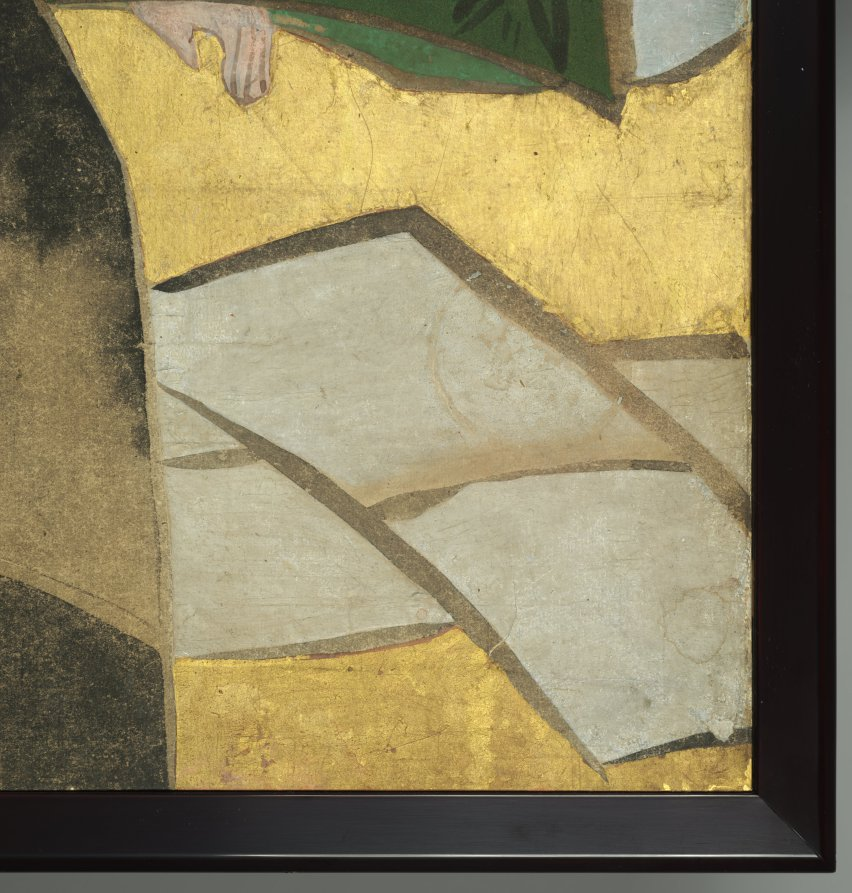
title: Thirty-Six Poetic Immortals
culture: Japan, Edo period (1615–1868)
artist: attributed to Tatebayashi Kagei (Japanese, active mid-1700s)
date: mid 1700s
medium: two-fold screen; ink, color, and gold on paper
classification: Painting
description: Fujiwara no Kintō (996–1075), a Japanese courtier, scholar, and poet, compiled select examples by the most celebrated composers of 31-syllable poems (waka) from the 600s to the 1000s. Painters soon made these “thirty-six poetic immortals” a favorite subject, traditionally presenting the poets in sequential, idealized portraits paired with their poems. In this interpretation, a chronologically impossible gathering of these great talents is in progress. The screen’s composition follows one devised by design virtuoso Ogata Kōrin (1658–1716).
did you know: The green surface edged with stripes at the upper left of the painting represents tatami matting with a silk border.